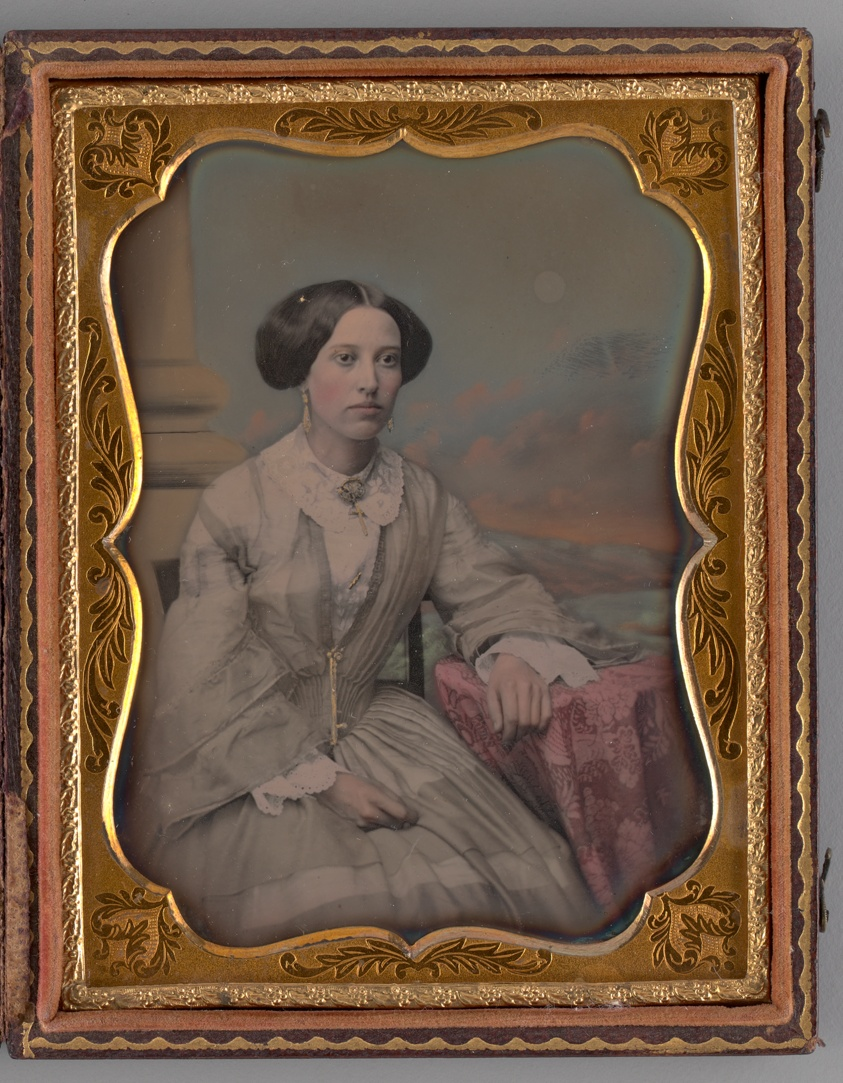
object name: Photograph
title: Untitled (Portrait of Seated Woman)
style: 19th century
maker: Albert Sands Southworth (American, 1811-1894); and Josiah Johnson Hawes (American, 1808-1901)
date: 1858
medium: Daguerreotype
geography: United States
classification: portrait; photograph; photographic process; photography; portrait; daguerreotype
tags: lundberg collection, portraits, portraits: female subject